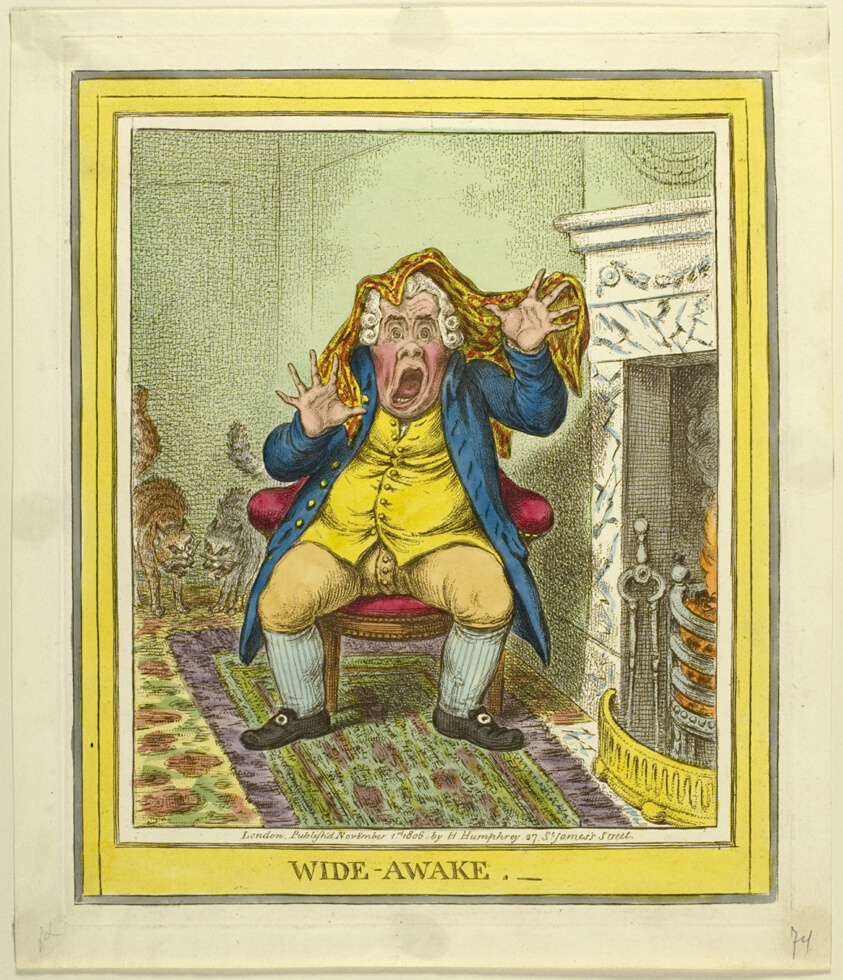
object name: Print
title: Wide Awake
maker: James Gillray (English, 1756-1815); published by Hannah Humphrey (English, c. 1745-1818)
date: published November 1, 1806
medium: Hand-colored etching on paper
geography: England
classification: etching; print; prints and drawing